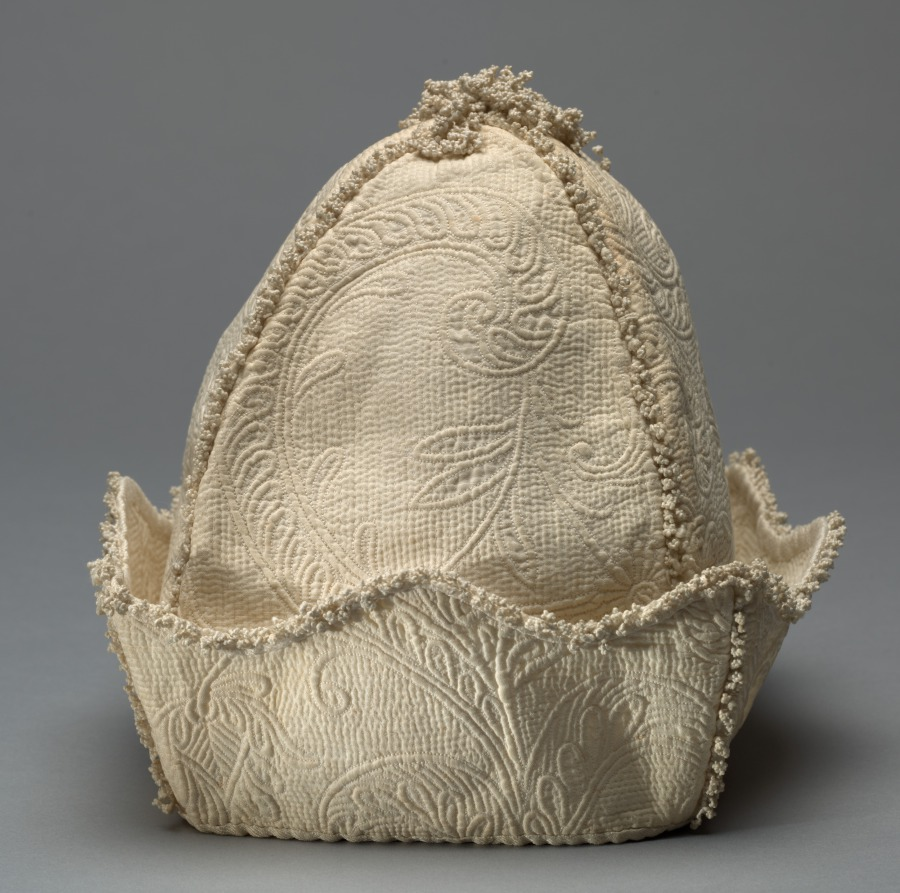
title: Man's Cap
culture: Denmark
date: 1600s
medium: linen with cotton design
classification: Garment